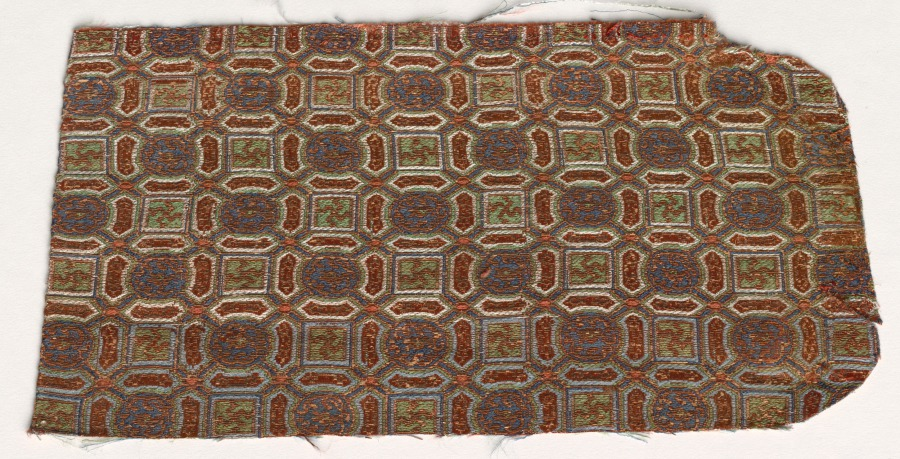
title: Fragment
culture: China, 19th century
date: 1800s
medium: silk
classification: Textile